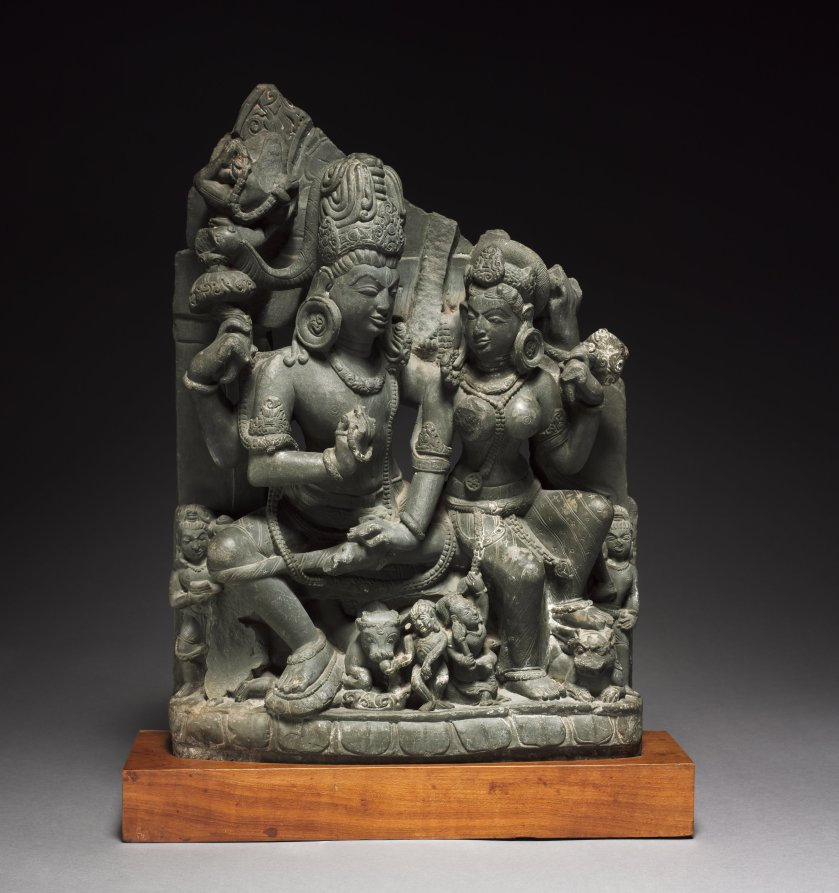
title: Siva and Parvati (Uma-Mahesvara)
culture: Northern India, Uttaranchal, Almoral, 10th century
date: 900s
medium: greenish-gray schist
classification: Sculpture